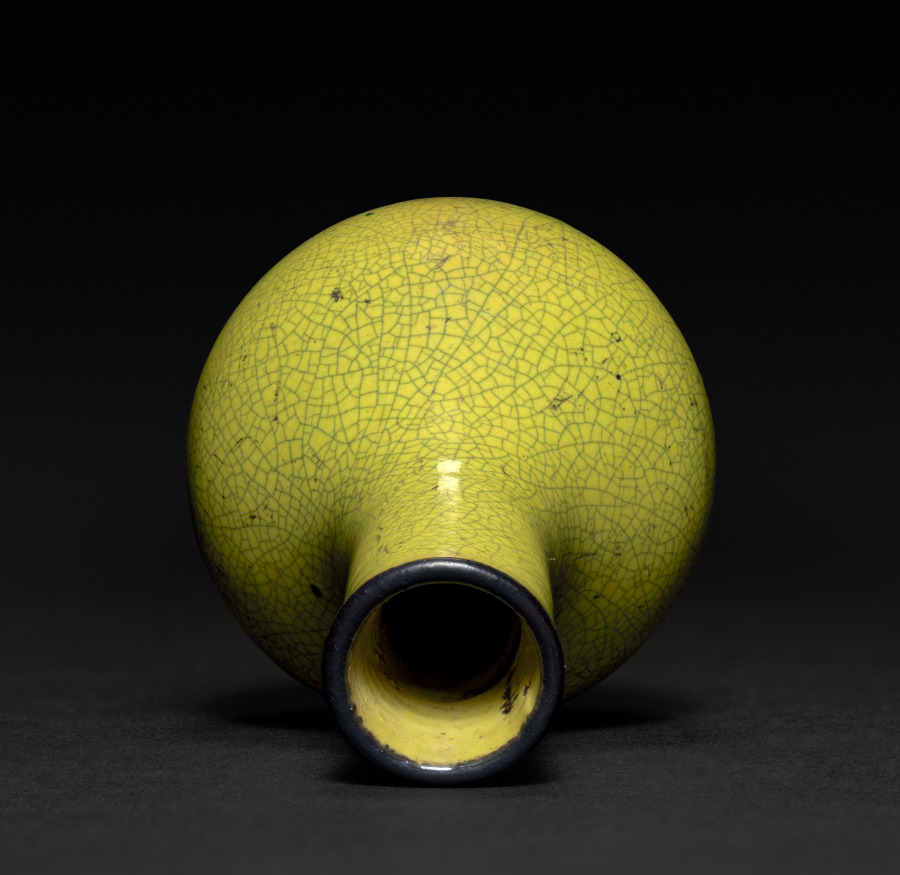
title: Vase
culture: China, Qing dynasty (1644-1911)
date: 1644–1911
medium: porcelain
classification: Ceramic